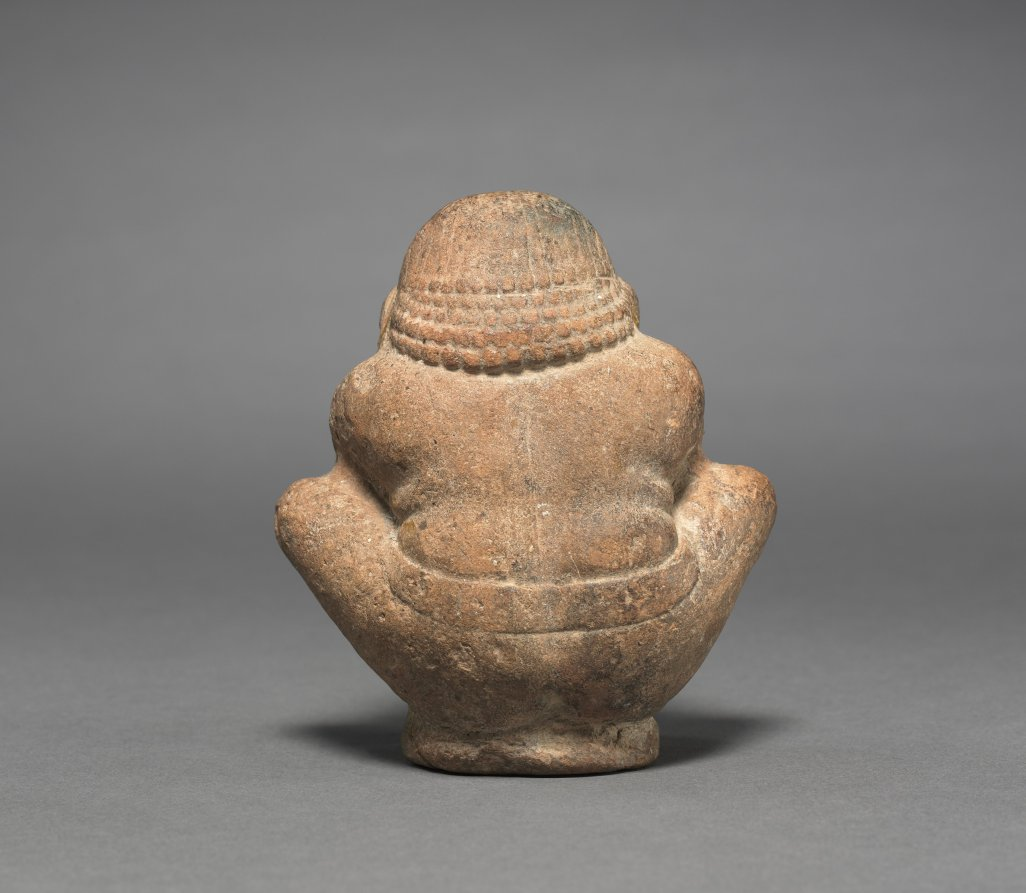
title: Crouching Dwarf Musician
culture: India, Shunga period (185–78 BCE)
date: 200–100 BCE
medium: terracotta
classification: Sculpture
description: Images of dwarfs referenced the fertility of the earth. With lush curling hair, portly full body, and visible genitals, this figure squats close to the earth and plays on a double flute pipe instrument.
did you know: Two holes at the top and bottom of the figure indicate that this object worked as a whistle.